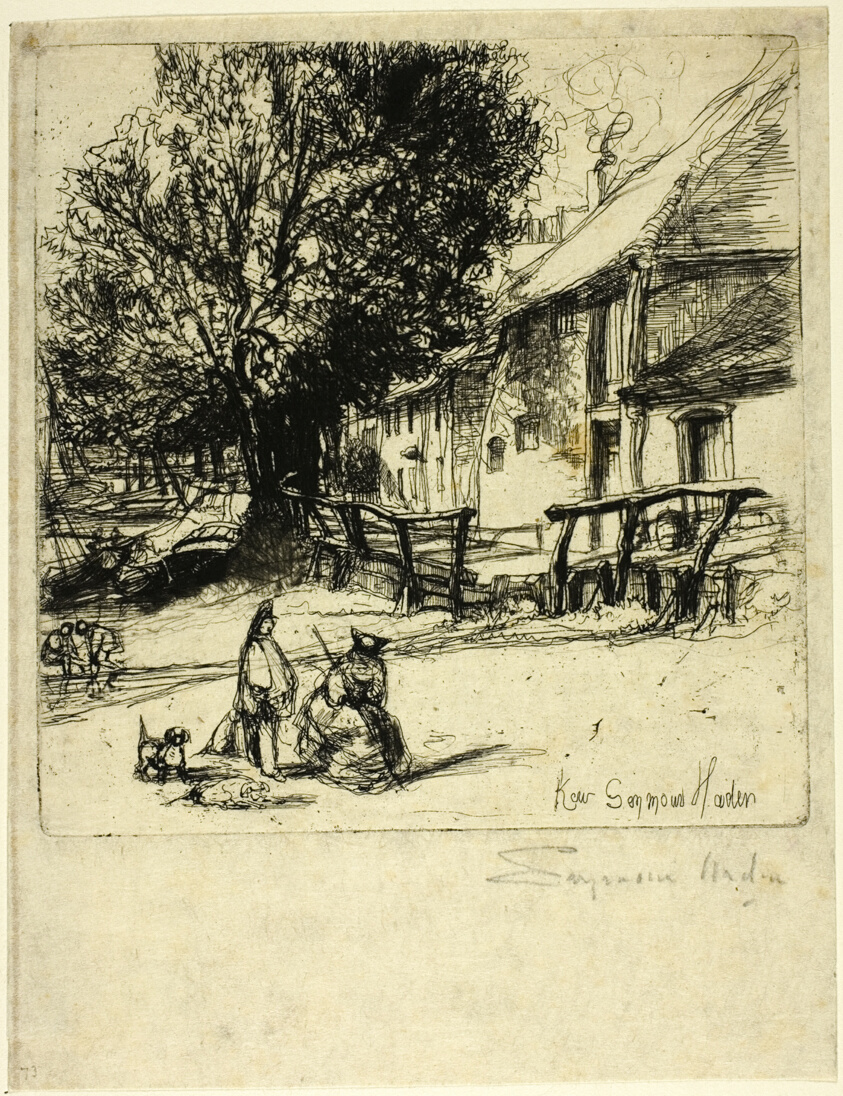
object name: Print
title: Kew Side, A Fragment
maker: Francis Seymour Haden (English, 1818-1910)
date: 1864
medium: Etching on ivory laid paper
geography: England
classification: etching; print; prints and drawing